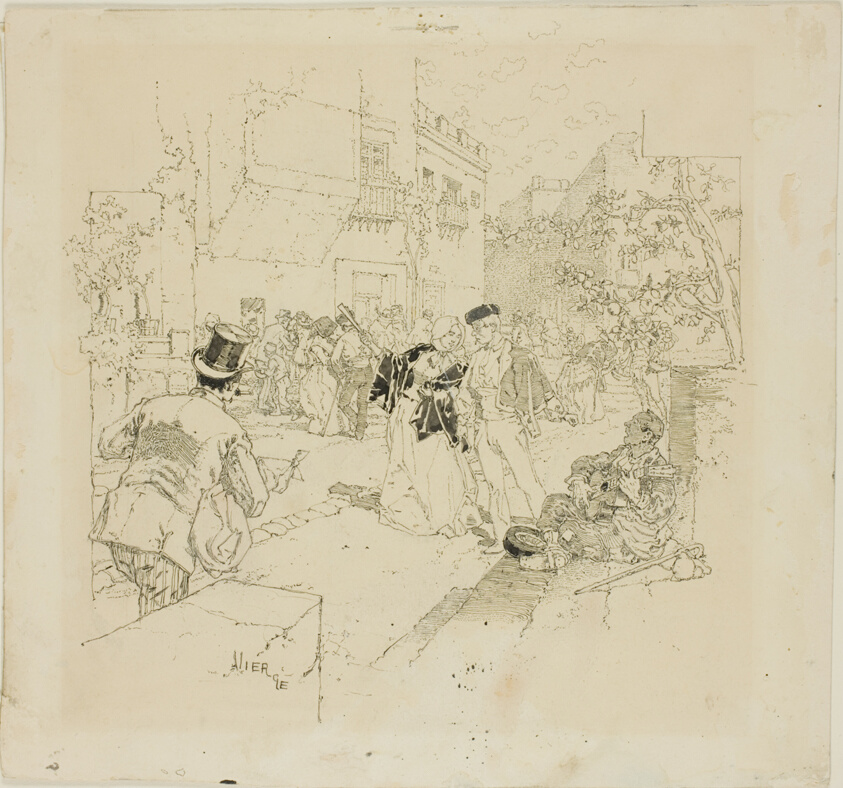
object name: Drawing and Watercolor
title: Street Scene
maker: Daniel Urrabieta Vierge (French, born Spain, 1851-1904)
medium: Pen and black ink, with touches of brush and black wash, over traces of graphite, on cream wove card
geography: France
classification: pen and ink drawings; drawings (visual works); prints and drawing